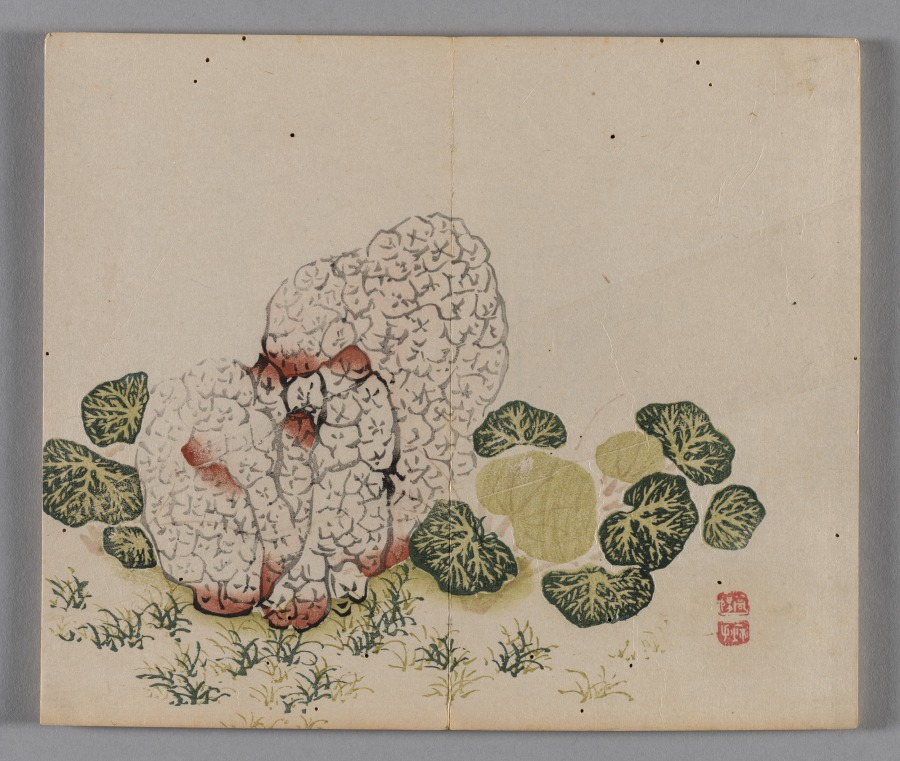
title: Ten Bamboo Studio Collection of Calligraphy and Painting: Miscellaneous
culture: China, Qing dynasty (1644-1911)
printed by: Hu Zhengyan (Chinese, c. 1584–1674)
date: 1633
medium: Woodblock-printed book; ink and colors on paper; first edition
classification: Print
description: Color printing reached a level of perfection in the early 1600s, as seen in this Ten Bamboo Studio Collection of Calligraphy and Painting and the Mustard Seed Garden Manual of Painting (printed 1679 and 1701). The painterly quality, precision in registering (aligning) the woodblocks, and harmonious colors made them the most successful color print editions in Chinese history. Both editions were printed and compiled in Nanjing, spread nationwide, and had a great impact on the arts in Japan and Korea.